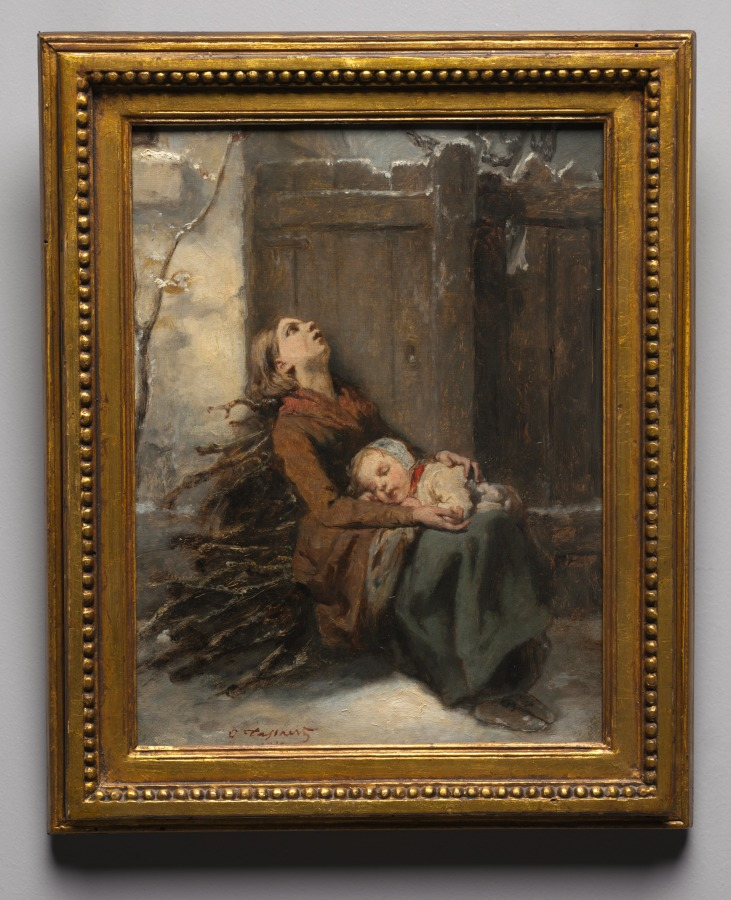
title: Destitute Dead Mother holding her sleeping Child in Winter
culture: France, 19th century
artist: Octave Tassaert (French, 1800–1874)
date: c. 1850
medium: oil on canvas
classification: Painting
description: One of France's leading artists of the mid-19th century, Octave Tassaert was known for his paintings of downtrodden workers, destitute mothers, suicides, and abandoned children. Viewers responded positively to his focus on issues of social injustice, as seen in this painting of a poor mother resting outdoors in the show with her baby. She is leaning against a pile of sticks, a common activity among the poor of gathering and selling small pieces for wood for burning in fireplaces or stoves.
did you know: Greatly admired by writers and social activists, Octave Tassaert provided illustrations for books by such celebrated authors as Alexandre Dumas père and Victor Hugo.